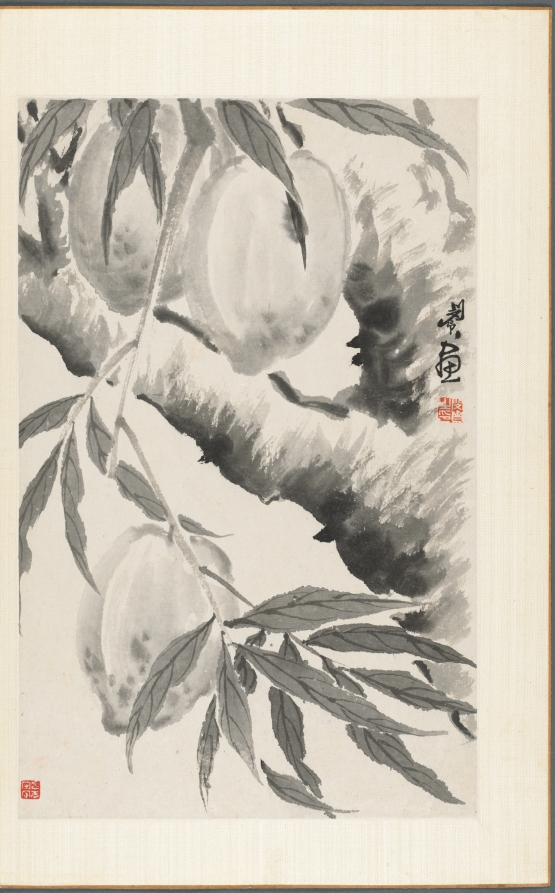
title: Peaches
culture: China, Qing dynasty (1644-1911)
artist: Min Zhen (Chinese, 1730–after 1788)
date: 1788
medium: album leaf, ink on paper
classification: Painting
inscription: Inscription by Min Chen on the last leaf: I have a habit of collecting strange rocks. My friend Tai-li shan-jen* treasures my paintings as much as I treasure strange rocks. Once we agreed to exchange what we love with each other. However, my busy activities have kept me from carrying this out. This summer I realized that this strange rock has been sitting in my studio for five years, so I painted this to fulfill my old promise. As a record, I chose the grotesque cliff in the last scene of this twelve-leaf album. Cheng-chai, Min Chen inscribed this on the sixth day of the sixth month [July 9] of the wu-shen year [1788]. * Tai-li shan-jen is Wang Li [tzu: Li-fu] tr. Hou-mei Ishida Six seals appearing on the leaves: Min Chen, Cheng-chai, Ching-ch'iao, Chen, Liao-t'ang, Min Chen chih-yin.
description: Min Zhen, who was orphaned at age 12 and developed an eccentric personality, was trained by Tang Yin (1682–1756), a writer, playwright, and superintendent of the imperial porcelain workshops in Jingdezhen. The connection to him may have enabled Min to stay in Beijing for a decade from around 1773. It is not clear whether he ever resided in Yangzhou, but his style is in many instances reminiscent of that of Yangzhou artist Huang Shen. This album demonstrates Min’s versatility and mature style in the last years of his life.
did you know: The peach is a symbol of immortality.